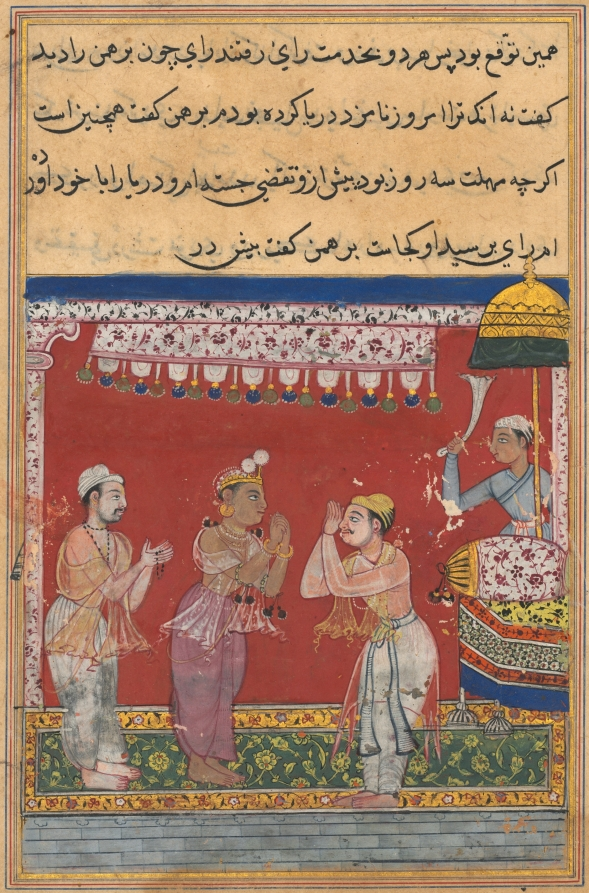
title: The king of the Ocean, having assumed human form, arrives at the court of the Raja, from a Tuti-nama (Tales of a Parrot): Eleventh Night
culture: Mughal India, court of Akbar (reigned 1556–1605)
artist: Ghulam 'Ali (Indian, active 1550s-1590s)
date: c. 1560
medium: gum tempera, ink, and gold on paper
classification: Painting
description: His hands raised in a gesture of respectful greeting, the Raja got down from his throne to welcome the king of the ocean, wearing a crown with white flowers. At the left, the Brahman holds a rosary in his hands. The raja wears the clothing and turban favored by Emperor Akbar: fine white muslin tunic with long points, pants, and a ready-tied flat turban. The king of the ocean is dressed like the Brahman, with a wrapped lower garment called a dhoti, and he wears a sacred thread over his left shoulder, which is the mark of a high-born Hindu.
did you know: The umbrella over the seat at the right marks the throne of the Raja.